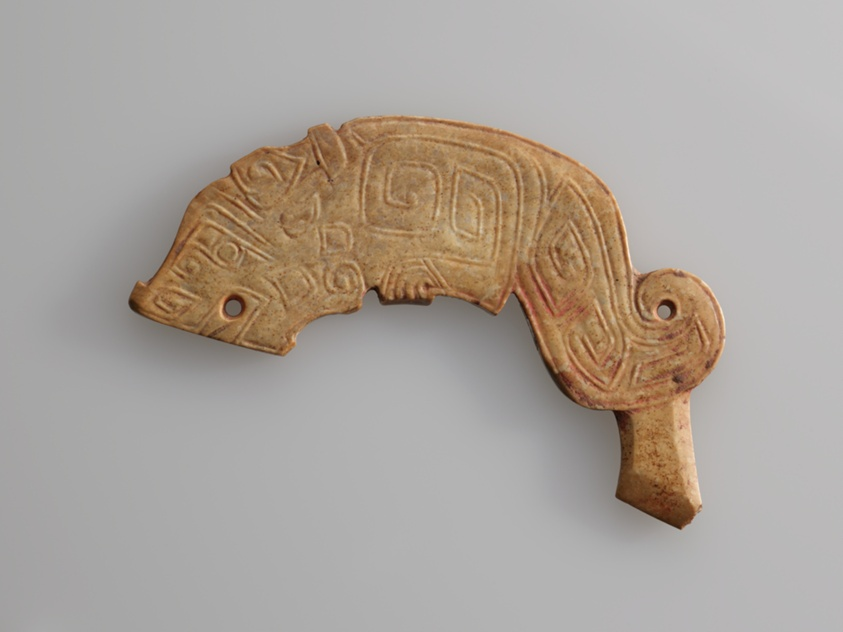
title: Pendant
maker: China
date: Shang dynasty (c. 1600–1050BC)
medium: Jade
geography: China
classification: jade; asian art